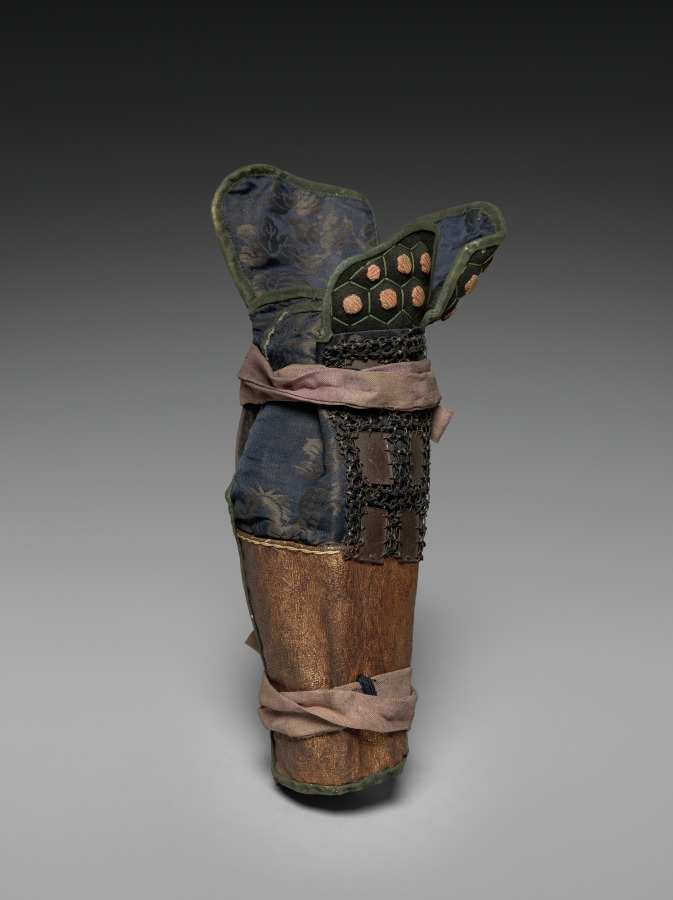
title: Shin Guard (Sune-ate)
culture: Japan, Edo period (1615–1868)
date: 1600s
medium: Iron, lacquer, textile (silk)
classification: Arms and Armor